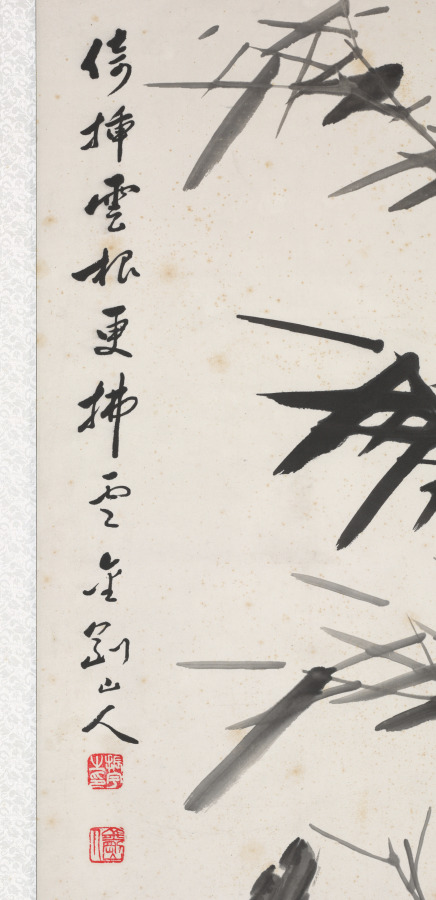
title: Bamboos in Wind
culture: Korea, Japanese colonial period (1910−1945)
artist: Kim Jin-woo (Korean, 1883–1950)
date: 1934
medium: Ten-panel folding screen; ink on paper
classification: Painting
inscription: Two chops stamped on each panel: 振宇之印 (Jinwoo’s Seal); 金剛山人 (Diamond Mountain Man)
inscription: Inscription written on the far-left panel: 甲戌流??寫於竹林堂金剛山人振宇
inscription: Inscription written on the 8th panel: 五百間淸風金剛山人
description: Active during the Japanese colonial period in Korea (1910–45), the artist Jin-woo Kim earned his artistic reputation for his expressive renditions of bamboo swaying in a strong wind. His piercing bamboo shoots are often compared to an iron spear, and their sharp leaves to a knife. It is believed that he deliberately emphasized sharpness in his brushstrokes to express his strong resistance against Japanese colonial oppression.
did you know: The artist’s prolific artistic production were a major part of fundraising efforts to support resistance activities for Korea’s independence.